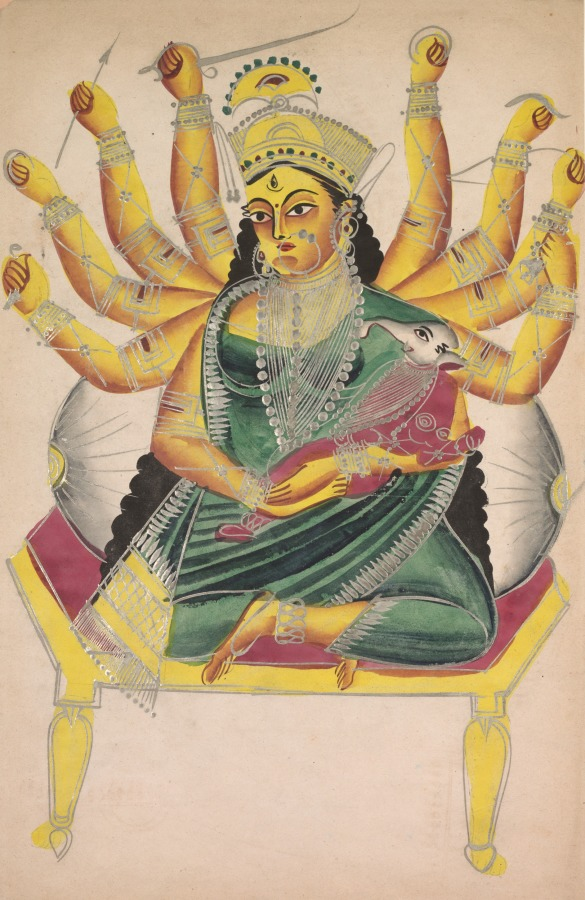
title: Ganesha-Janani (Mother of Ganesh)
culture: Eastern India, Bengal, Kolkata, Kalighat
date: c. 1890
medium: Gum tempera, graphite, ink, and tin on paper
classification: Painting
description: The goddess Parvati is portrayed here with the infant Ganesh in her arms. Ganesh is the ever-popular elephant-headed deity who is worshipped as the mischievous god of obstructions and beginnings. Ganesh is fashioned from the dirt of Parvati’s body. At his mother’s request, Ganesh guarded her as she bathed, only to be confronted by the god Shiva, Parvati’s husband, who is refused entry. Not knowing that Ganesh is his son, Shiva cuts off his head and enters. Parvati demands that Ganesh be restored. Ganesh is often portrayed as an infant when depicted with his mother Parvati, highlighting his childlike character.